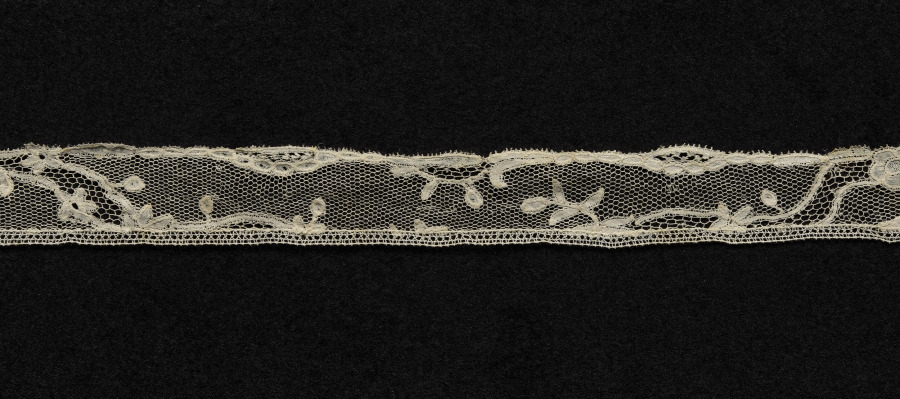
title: Lace Edging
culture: Belgium, Brussels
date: 1700s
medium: Bobbin lace with appliqué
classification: Lace